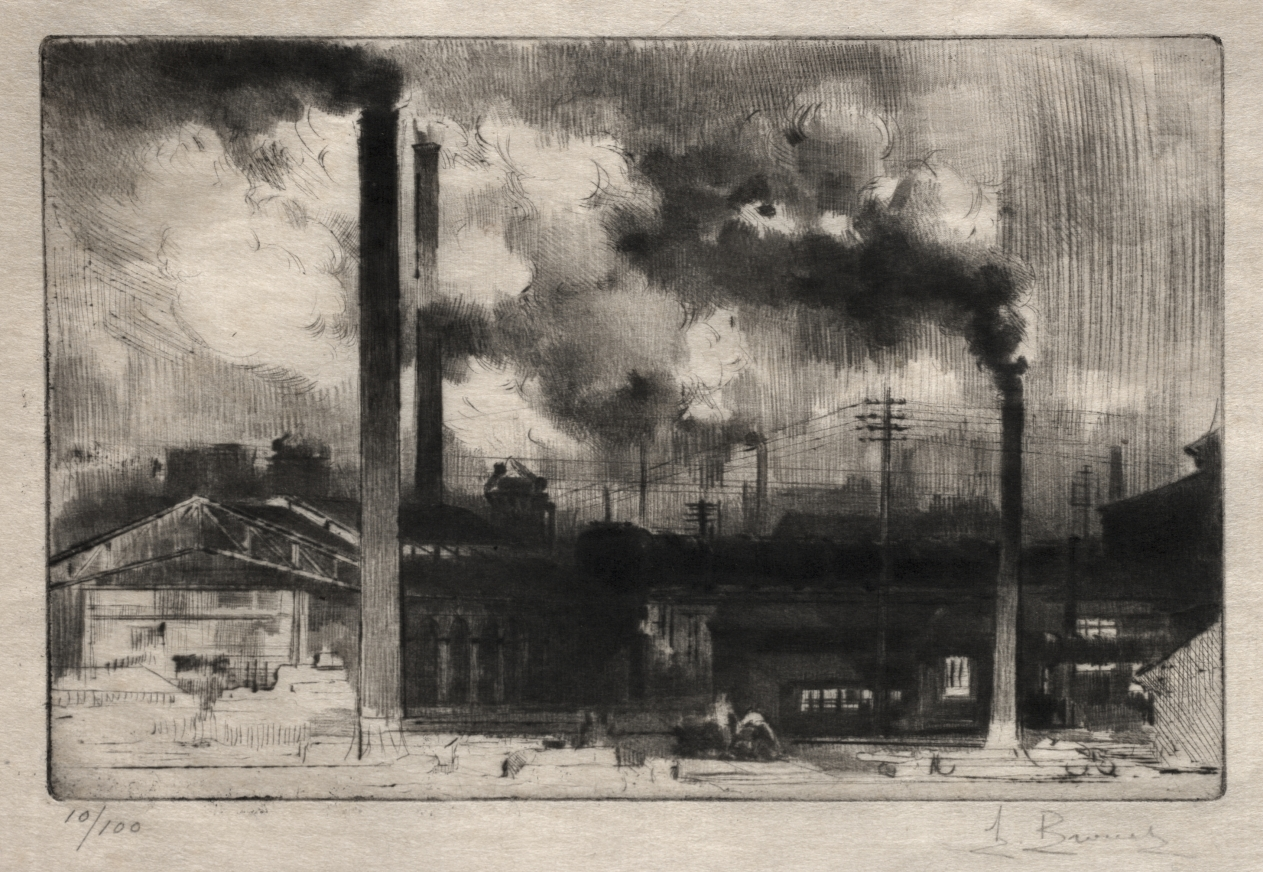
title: At the Creusot Works: The Smokestacks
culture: France, 20th century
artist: Auguste Brouet (French, 1872–1941)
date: c. 1902–41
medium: etching, roulette and aquatint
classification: Print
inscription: in graphite, lower left: 10/100; lower right: A. Brouet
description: This donation was unusual because it included many prints by one artist: eleven single sheets and two books illustrated by Brouet (containing a total of 96 etchings). The result is a comprehensive survey of the artist's work.